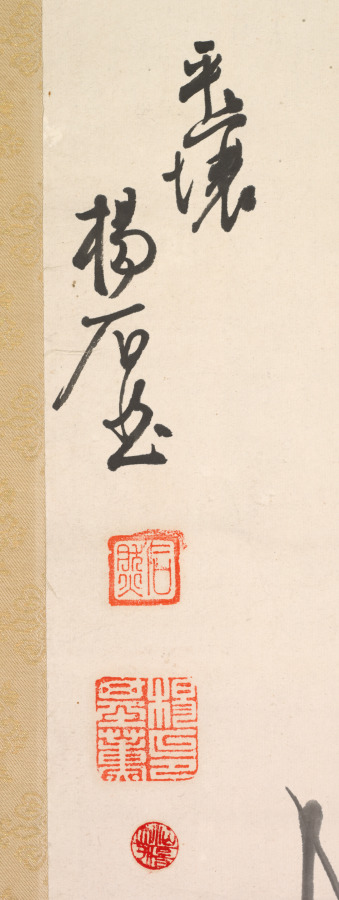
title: Egret and Reeds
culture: Korea, Joseon dynasty (1392–1910)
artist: Yang Ki-hun (Seuk-Eun) (Korean, 1843–1919?)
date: late 1800s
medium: hanging scroll; ink on paper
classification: Painting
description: In this hanging scroll, an egret walks along the shores of a salt marsh where reeds abundantly grow. Native to Pyongyang, the artist Yang Ki-hun had no rival in bird-and-flower themes. The Taedong River estuary, one of Pyongyang’s beloved natural sites, may have been Yang’s favorite spot to observe and sketch various water birds. Yang treated his subjects of flora and fauna with an observant naturalist’s view, yet his choice of subjects—an egret and reeds—is deeply rooted in traditional symbolic language: the egret stands for the scholarly reclusive life, while reeds indicate humility and modesty.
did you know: Yang Ki-hun was one of the most commercially successful painters known for decorative bird-and-flower subjects.